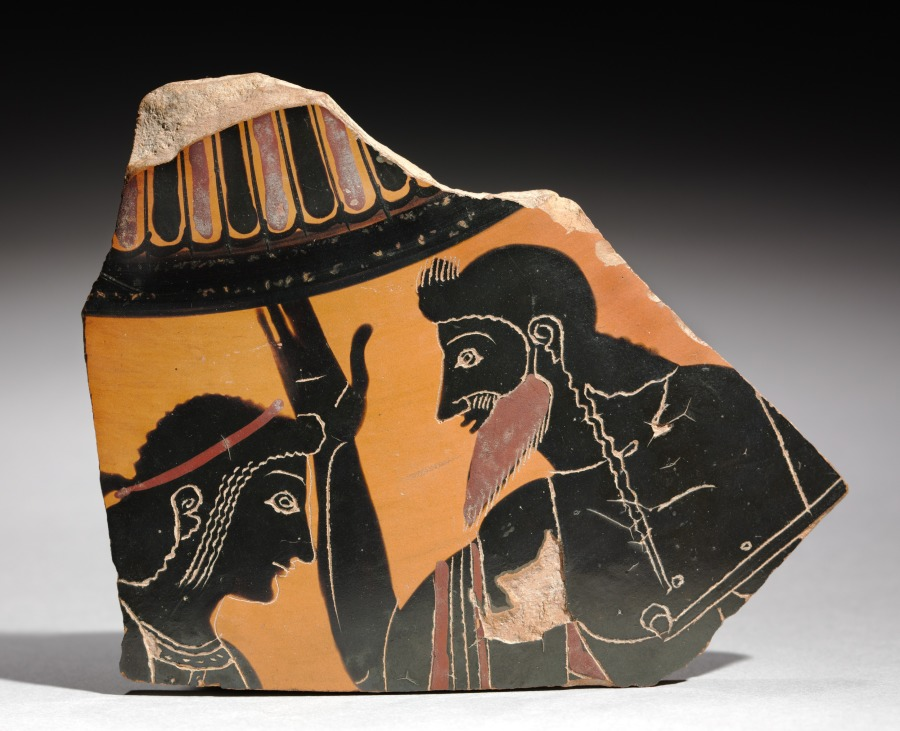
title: Five Fragments from Four Painted Vases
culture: Greek, Attic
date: c. 520–430 BCE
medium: ceramic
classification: Ceramic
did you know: These five fragments entered the collection together but derive from four different vessels. See individual records for more information.